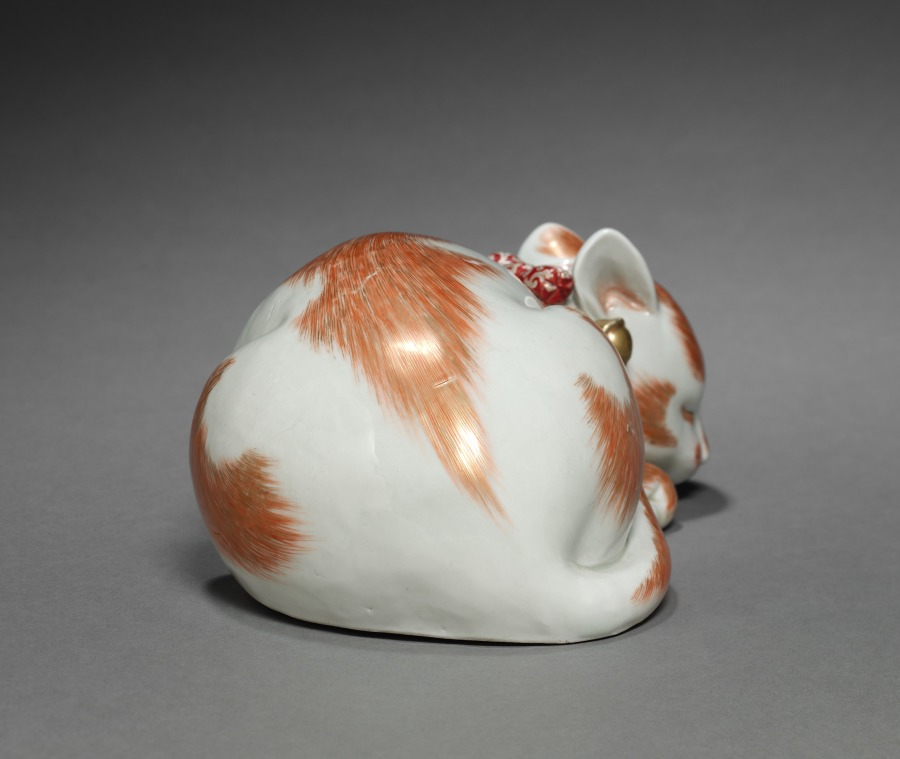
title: Sleeping Cat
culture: Japan, Edo period (1615–1868)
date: early to mid-1800s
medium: Porcelain with overglaze color enamel and gold (Hizen ware)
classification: Sculpture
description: Models of sleeping cats with collars and bells like this one were popular as decorative objects, and some of them also served as incense burners or hand warmers. This cat was just for display and has very carefully incised lines in the surface of the clay body, as well as thin strokes of orange and gold over the glaze to create the sense of soft fur.